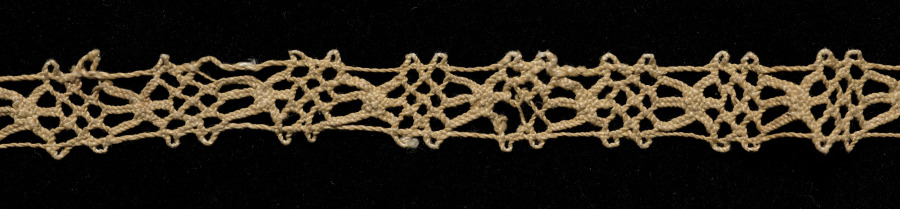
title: Lace Insertion (with selvage)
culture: Italy, Venice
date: 1540–60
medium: Bobbin lace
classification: Lace